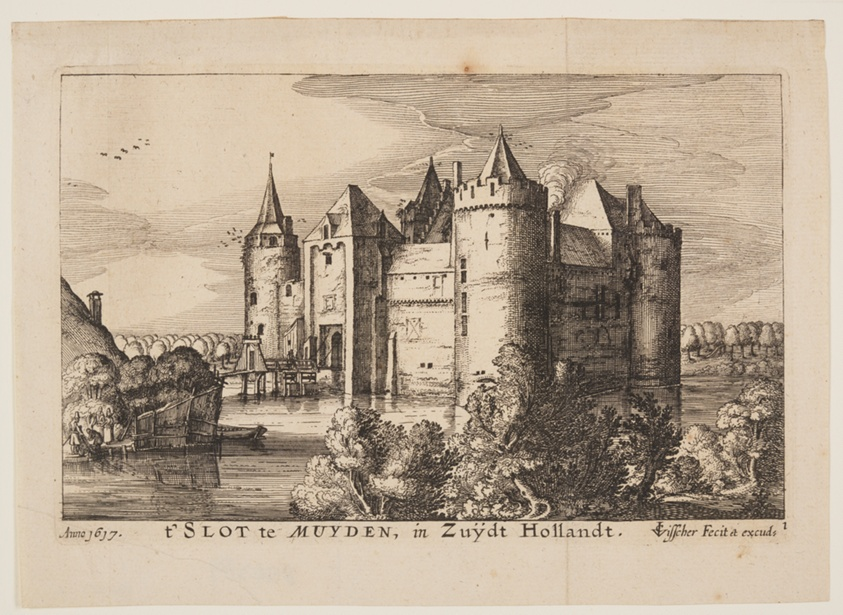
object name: Print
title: The Castle of Muiden (in reverse), from Four Castles in Holland and Utrecht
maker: Claes Jansz. Visscher (Netherlandish, c. 1550–c. 1612)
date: 1617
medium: Etching on ivory laid paper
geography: Netherlands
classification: print; paper; prints and drawing; etching